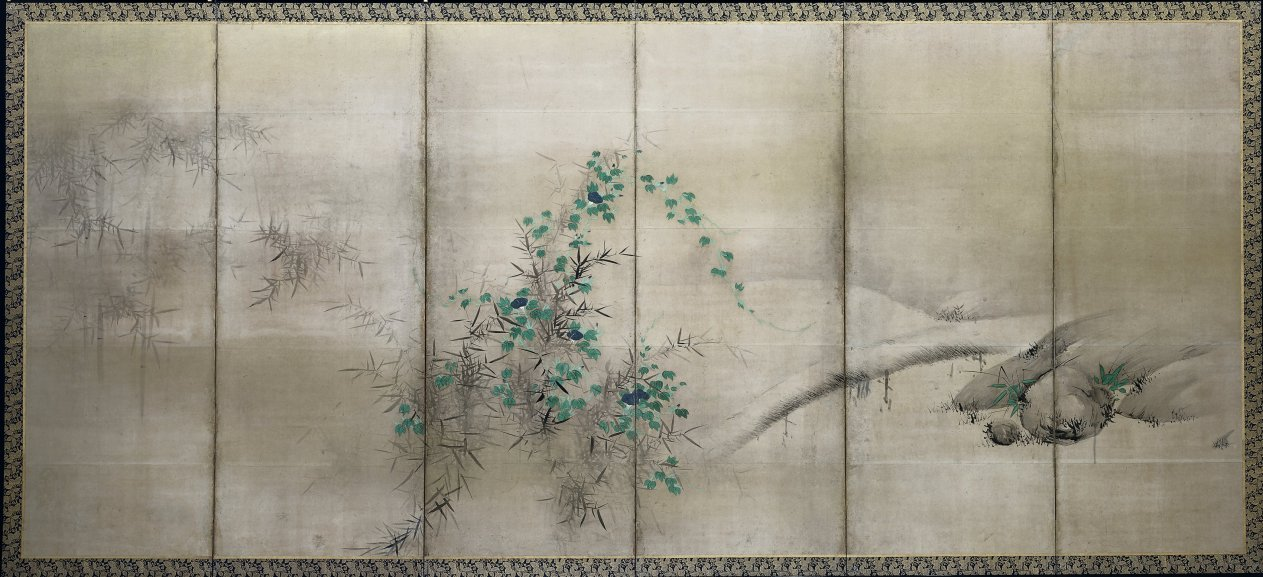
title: Winter and Summer Flowers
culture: Japan, Momoyama period (1573–1615)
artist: Kaihō Yūshō (Japanese, 1533–1615)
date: c. 1600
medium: One of a pair of six-panel folding screens; ink, color, and gold on paper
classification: Painting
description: White camellias bloom behind a large pine in the right screen and blue morning glories creep through bamboo in the left screen of this composition. The mountains and bridge suggest a continuous landscape, but the paintings actually juxtapose flowers of winter and summer, with time progressing from right to left. Kaihō Yūshō painted similar landscapes for Zen temples in Kyoto.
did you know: The pine and bamboo are defined by ink wash, but the flowers take form through color within contour lines.